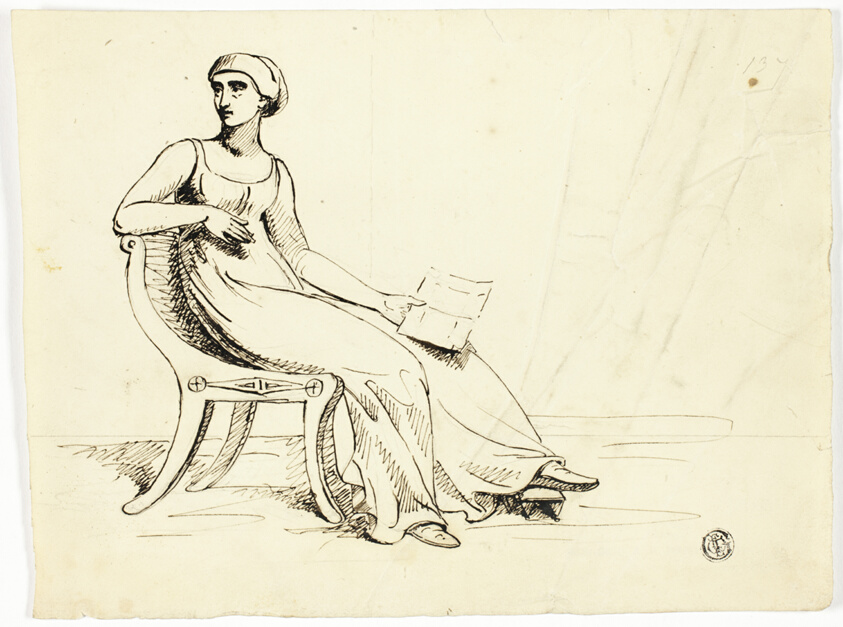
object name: Drawing and Watercolor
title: Woman Seated in Roman Chair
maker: John Downman (English, 1750-1824)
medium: Pen and brown ink, with touches of graphite, on cream wove paper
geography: England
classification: pen and ink drawings; paper; drawings (visual works); prints and drawing